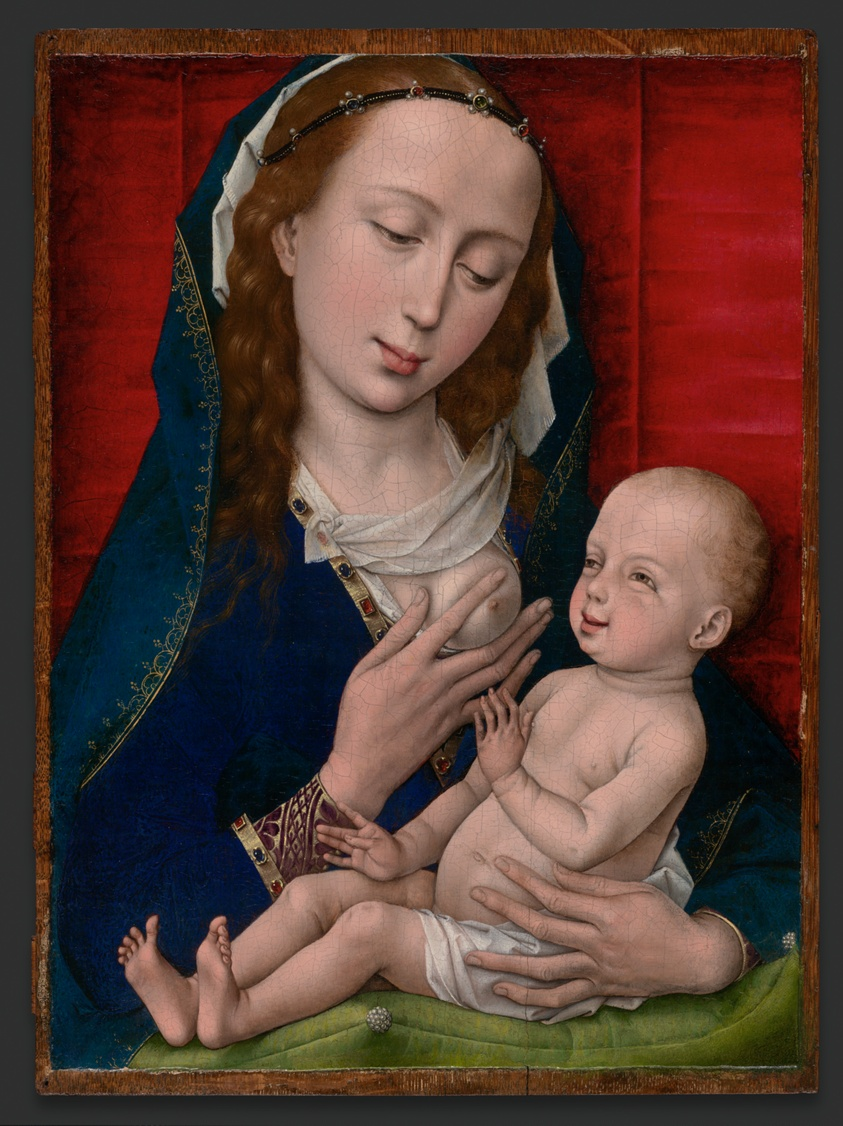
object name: Painting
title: Virgin and Child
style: 15th century, Renaissance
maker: Workshop of Rogier van der Weyden (Netherlandish, c. 1399-1464)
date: 1460/65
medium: Oil on panel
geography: Belgium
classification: oil on panel; paint; oil paintings (visual works); painting; european painting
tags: Virgin and child/Madonna and child, Virgin Mary, Jesus, mother, mother and child, babies, children, blue, blue (color), red (color), green (color), religion, religious, religious figures, religious scenes, Christian subjects, Christianity, Century of Progress, world's fairs, Chicago World's Fairs